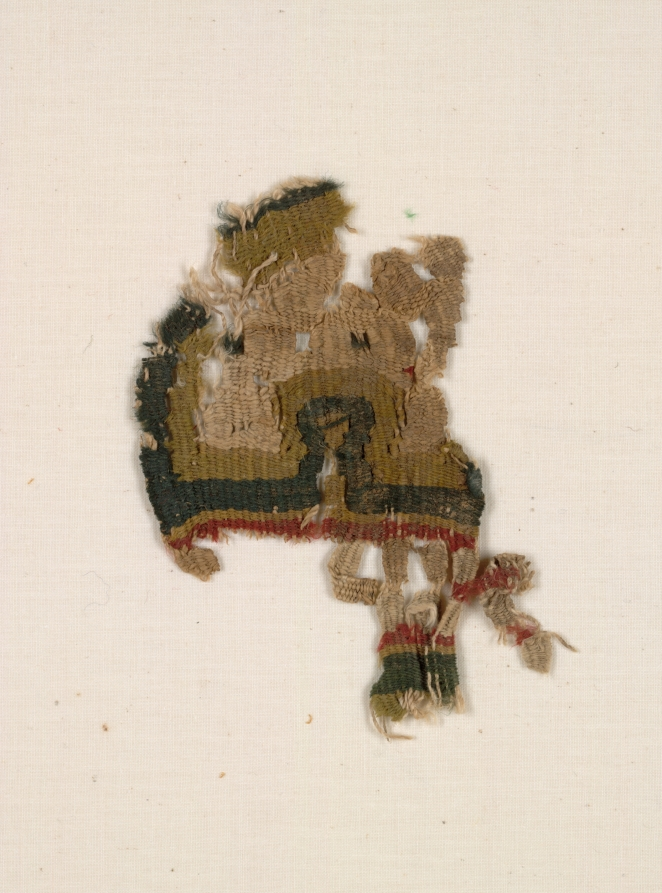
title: Two Fragments with Indistinguishable Design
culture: Egypt ?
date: before 1968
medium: Linen and wool: tapestry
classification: Textile